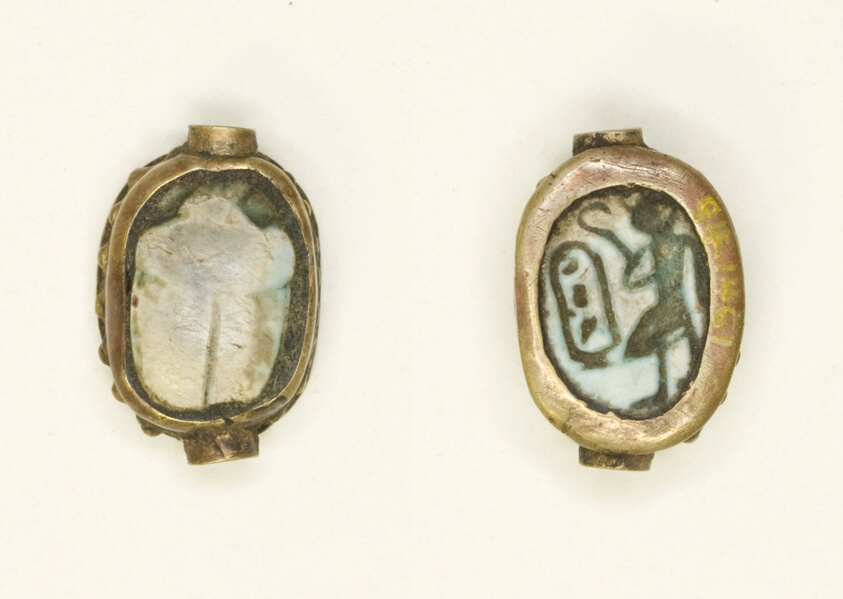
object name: Costume and Accessories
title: Scarab: Cartouche and Standing King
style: new kingdom, ancient, eighteenth dynasty, egyptian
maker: Egyptian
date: New Kingdom, Dynasty 18, Reigns of Thutmose III–Amenhotep III (about 1479–1352 BCE)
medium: Faience and gold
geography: Egypt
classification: scarab; ancient art; costume; faïence (composite material)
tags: king, Hieroglyphs, insects